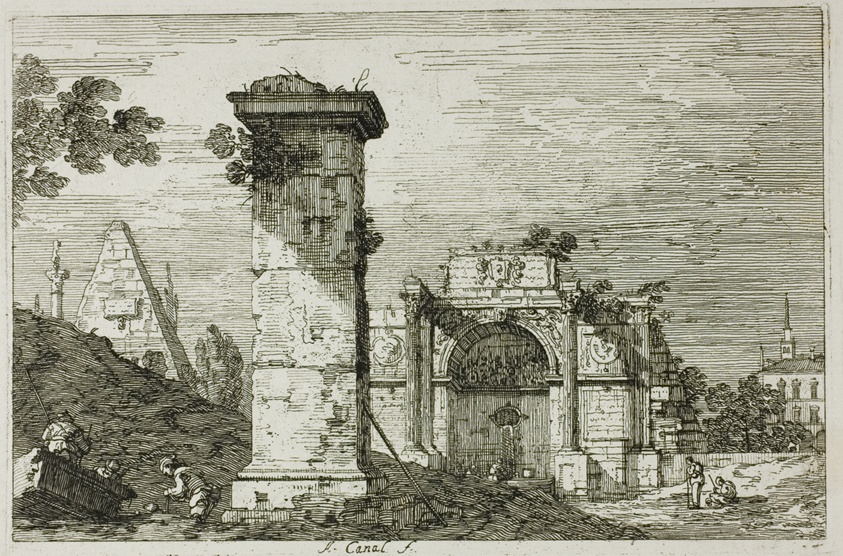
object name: Print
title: Landscape with Ruined Monuments, from Vedute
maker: Canaletto (Italian, 1697-1768)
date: 1735/44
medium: Etching in black on ivory laid paper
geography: Italy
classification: etching; print; prints and drawing